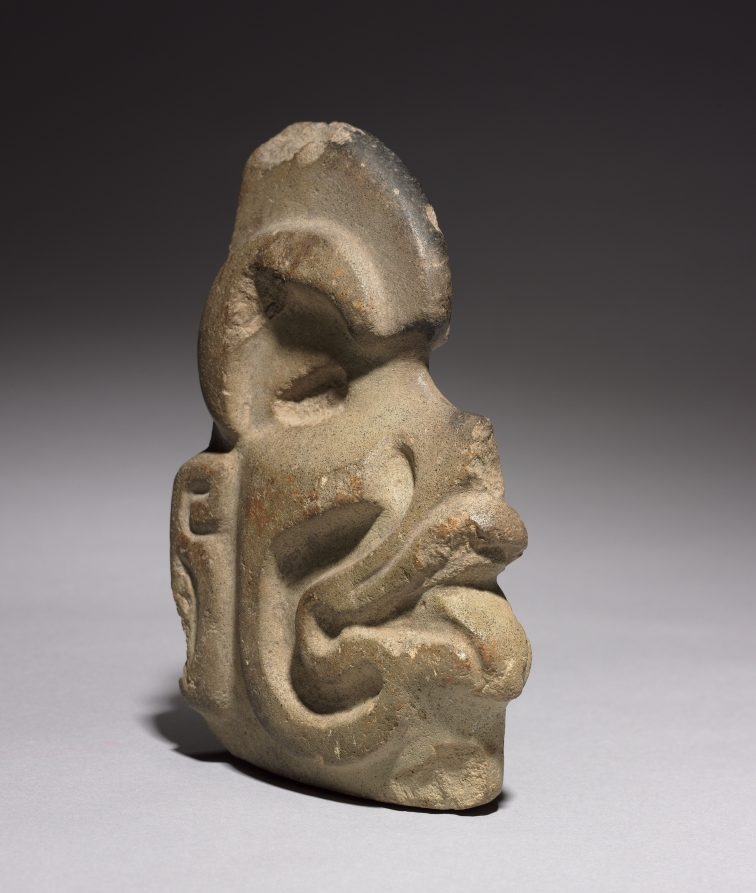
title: Head-Shaped Hacha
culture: Mexico, Isthmus of Tehuantepec(?), Coastal Lowlands style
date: 400–950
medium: stone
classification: Sculpture